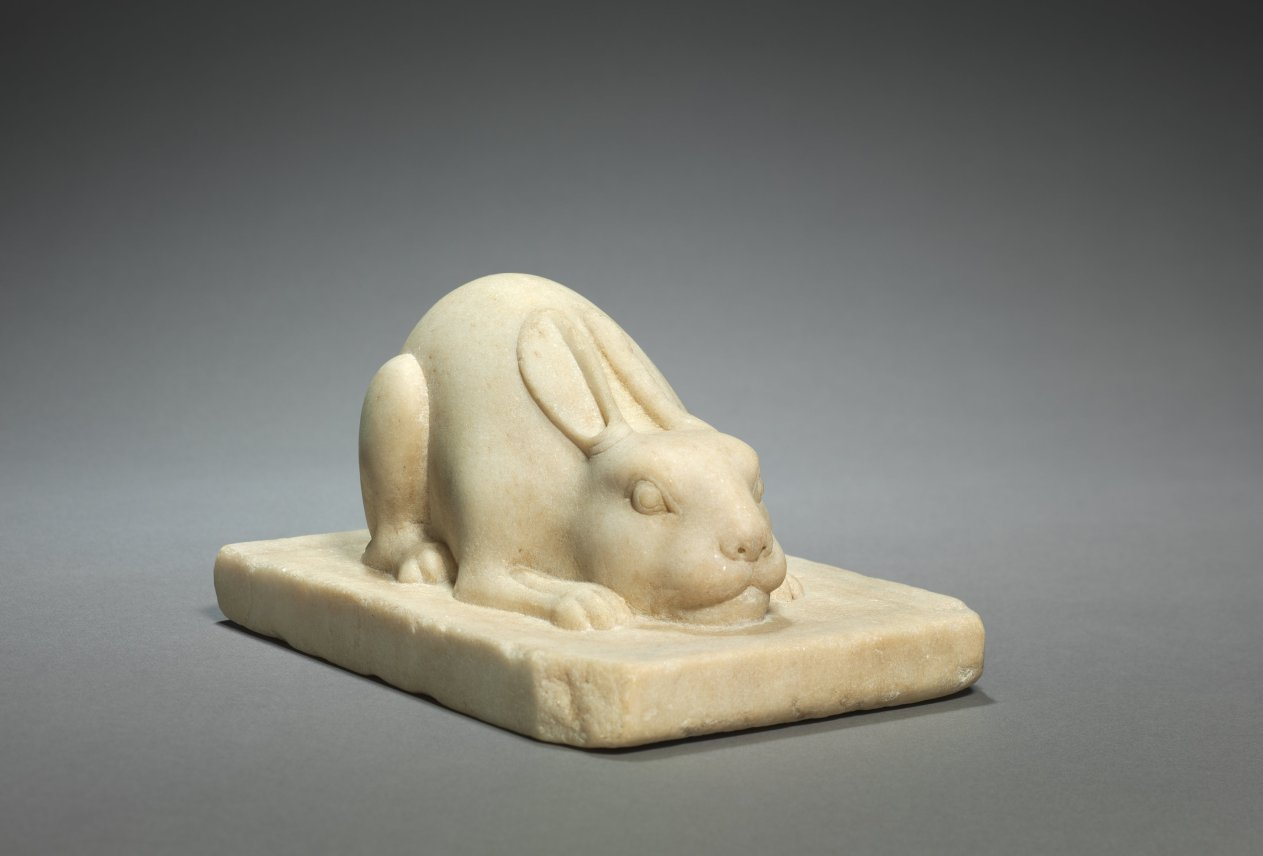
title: Hare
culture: North China, Tang dynasty (618-907)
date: early 700s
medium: white marble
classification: Sculpture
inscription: Incised on brow: 'wang' (in Chinese character)